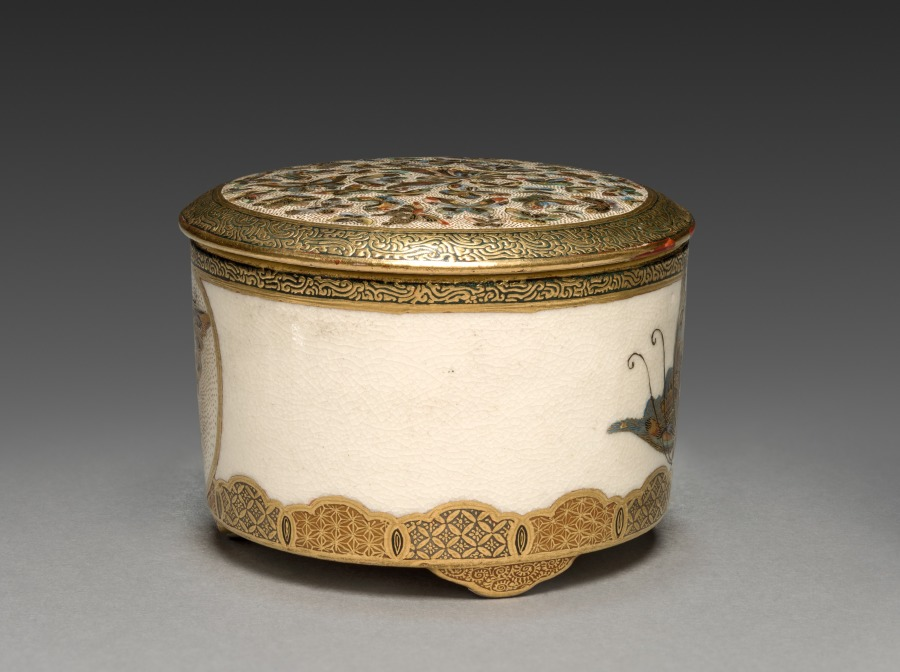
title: Jar with Butterflies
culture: Japan, Meiji period (1868–1912)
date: late 1800s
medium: porcelain (Satsuma ware)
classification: Ceramic